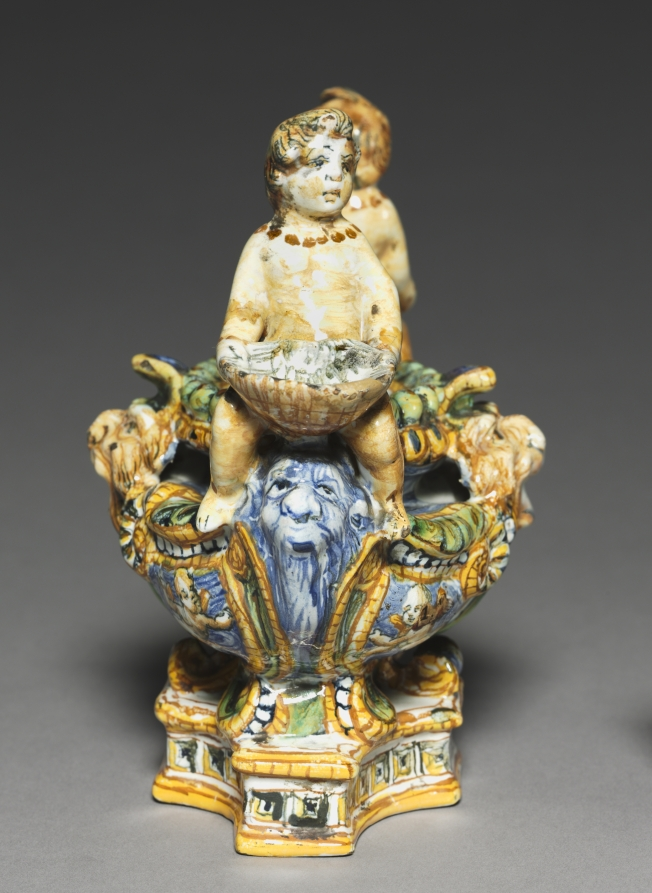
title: Saltcellar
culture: Italy, Urbino, 16th century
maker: circle of the Patanazzi Family (Italian)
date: c. 1570–90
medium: tin-glazed earthenware (maiolica)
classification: Ceramic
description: During the Italian Renaissance of the 1400s and 1500s, nobles and merchants eager to express their wealth and sophistication ordered ceramics for dining, display, and storage. Known as maiolica, because it resembled the brightly colored ceramics from the Mediterranean island of Majorca, these ceramic vessels were covered with a tin glaze that provided an opaque white surface on which colorful decoration could be painted.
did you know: During the Renaissance, salt was an expensive commodity and was used to both season and preserve food.